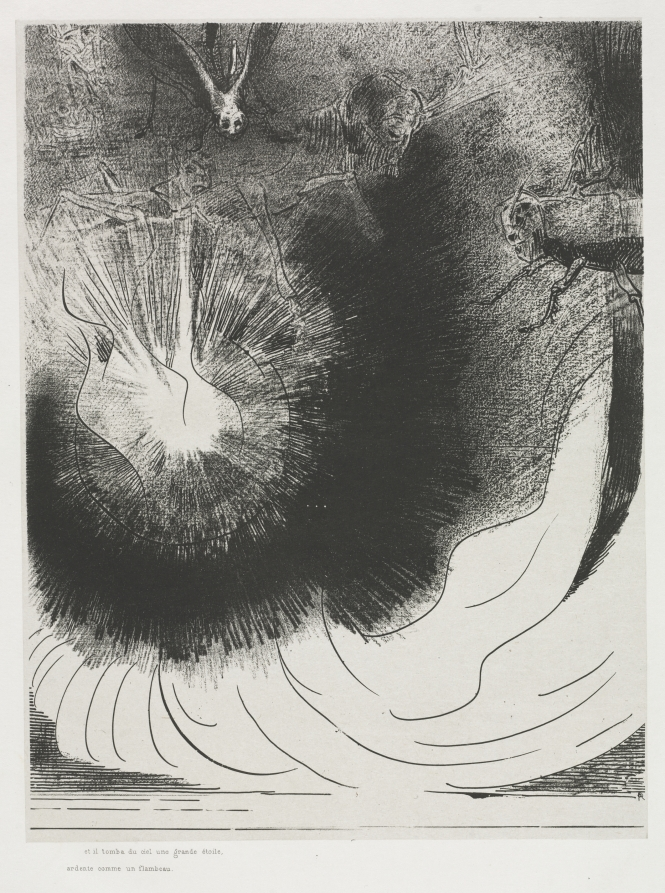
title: And There Fell a Great Star from Heaven, Burning as it were a Lamp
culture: France, late 19th Century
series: The Apocalypse of Saint John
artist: Odilon Redon (French, 1840–1916)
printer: Blanchard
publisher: Ambroise Vollard (French, 1867–1939)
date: 1899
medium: lithograph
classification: Print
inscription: initialed on stone at lower right: OR; printed at lower left, below image: et il tombe du ciel une grande étoile, / ardente comme un flambeau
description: The last of Odilon Redon’s 11 lithographic portfolios, this series relates to the Book of Revelation from the Christian Bible. The subject had been explored throughout art history, allowing the artist to align himself with past masters, such as Albrecht Dürer. Although Redon often vaguely referenced texts, these prints directly illustrate 12 individual passages, including one about a woman clothed with the sun and another focused on a great star falling from heaven. By the time he created this portfolio, Redon’s reputation was well established. The project was published by art dealer Ambroise Vollard, who began to sell and promote Redon’s work about a year earlier, building a market for his prints in Paris and abroad.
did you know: This is one of the last works where Redon experimented with lithograph and all-black medium. In contrast, bright, dazzling colors characterize his late works.